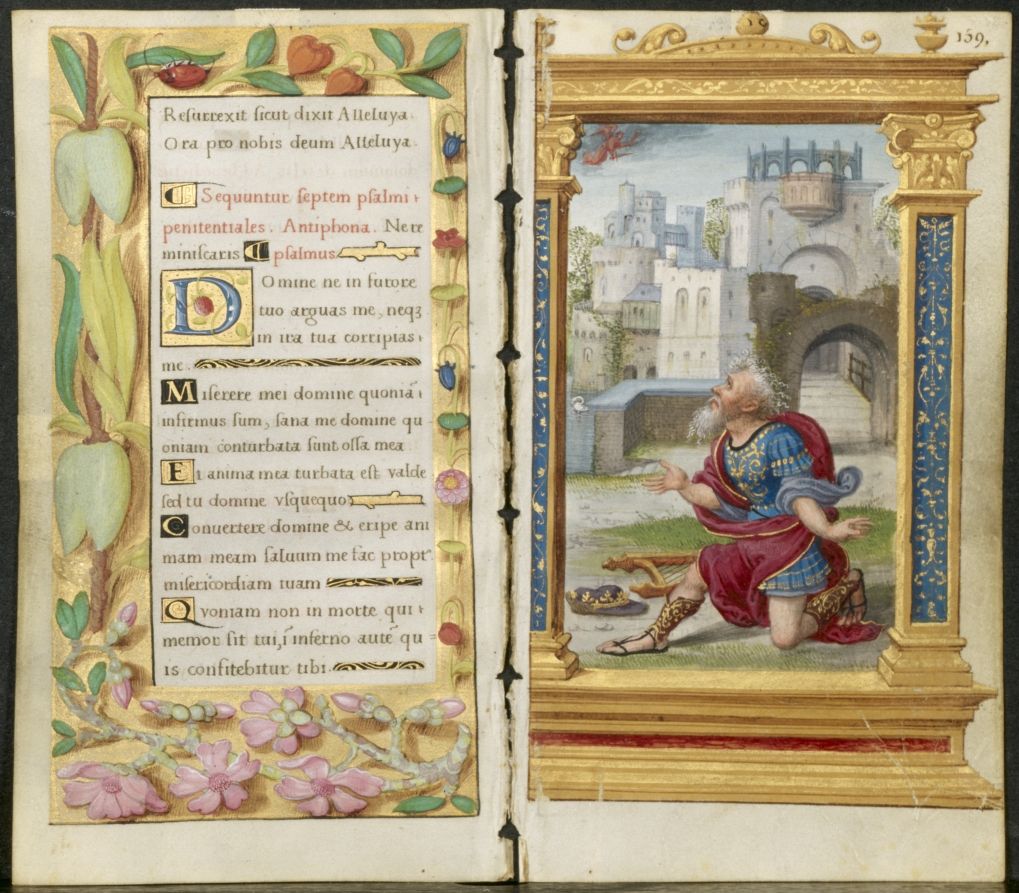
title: Leaf from a Book of Hours: Penitential Psalms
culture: France, 16th century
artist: Noël Bellemare (French, d. 1546)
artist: The 1520s Hours Workshop (French)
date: c. 1530–1535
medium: ink, tempera and liquid gold on vellum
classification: Manuscript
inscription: Resurrexit, sicut dixit, alleluia: Ora pro nobis Deum, alleluia. Sequuntur septem pfalmi penitentiales. Antiphona. Ne reminiscaris. psalmus: Domine , ne in durore tuo arguas me Miserere mei domine quoniam infirmus sum : sana me domine, quoniam conturbata sunt ossa mea Et anima mea turbata est valde : sed tu domine usquequo Convertere domine et eripe animam meam : salvum me fac propter misericordiam tuam. Quoniam non est in morte qui memor sit tui : in inferno autem quis confitebitur tibi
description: The 1520s Hours Workshop produced luxury books of hours for a wealthy, often royal, clientele. Recent evidence points to Paris as the site of the workshop’s activity under the direction of Antwerp-born miniaturist Noël Bellemare (died 1546). Containing fuschia pinks and bright acid greens, the palette is unusual in French manuscript painting of the period. Instead, Bellemare’s miniatures point directly to Antwerp painting at the time.